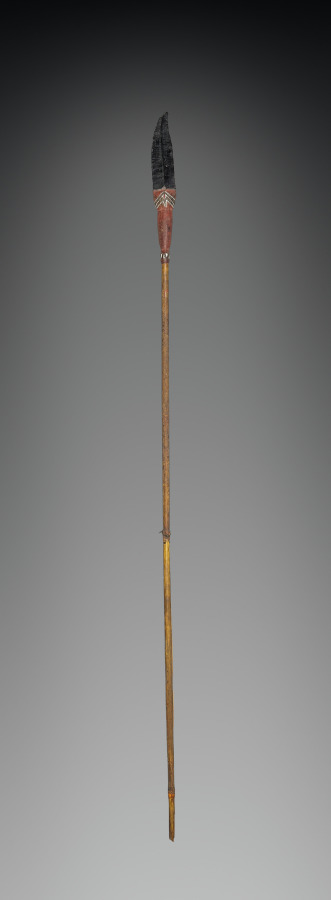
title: Spear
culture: South Sea Islands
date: before 1922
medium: metal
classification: Arms and Armor